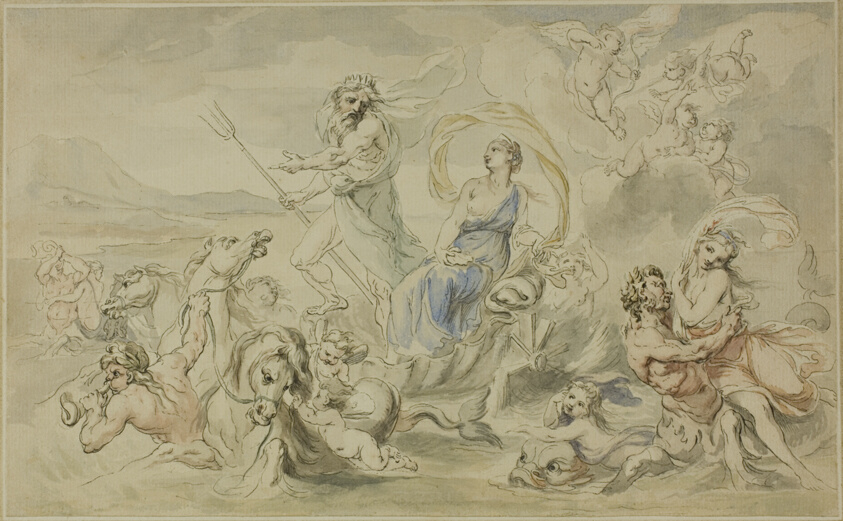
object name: Drawing and Watercolor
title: Triumph of Neptune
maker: Attributed to Giovanni Battista Cipriani; Italian, 1727-1785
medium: Pen and black ink with brush and gray wash, and watercolor, on cream laid paper, laid down on card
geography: Italy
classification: watercolor; drawings (visual works); prints and drawing